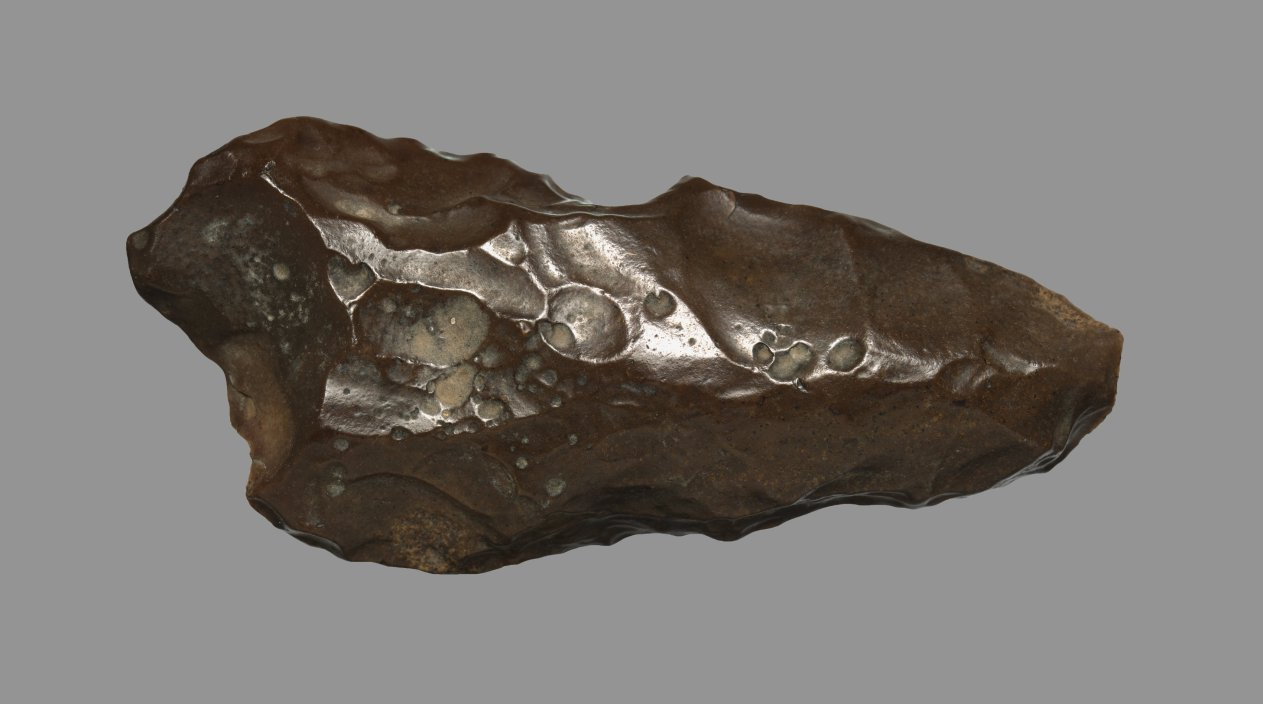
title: Hand Axe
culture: Egypt, Paleolithic period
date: c. 120,000–30,000 BCE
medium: black to dark-green flint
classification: Implements